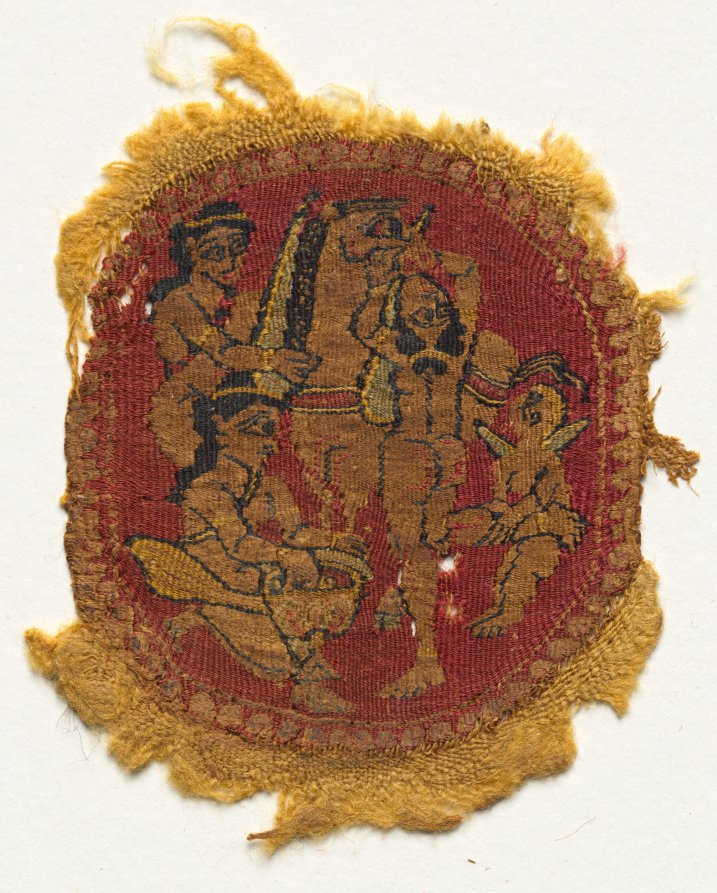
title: Five Round Segmenta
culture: Egypt, Umayyad period (661–750)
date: 650 – 750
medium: tapestry weave: wool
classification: Textile